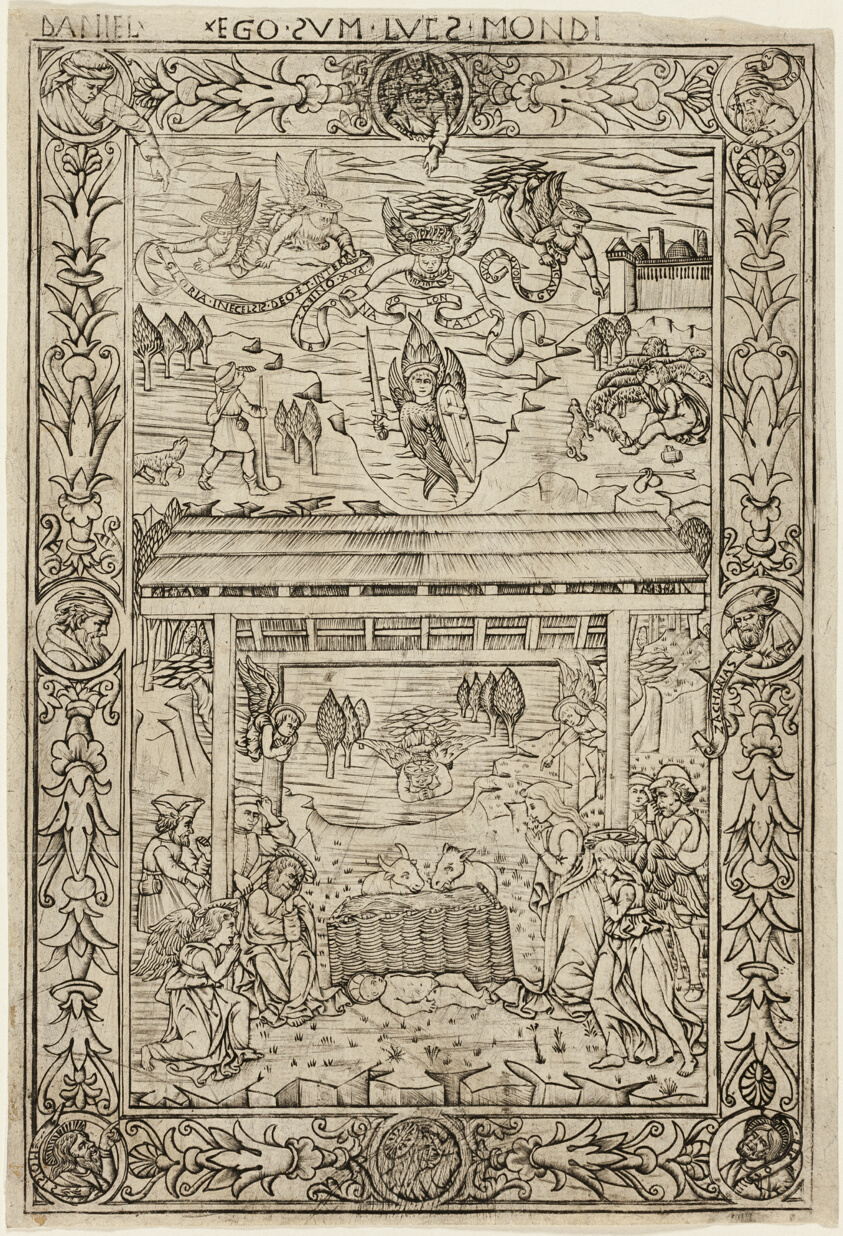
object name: Print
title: The Nativity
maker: Unknown artist (Italian, 15th century)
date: 1460/70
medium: Engraving in black on cream laid paper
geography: Italy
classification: engraving; print; prints and drawing